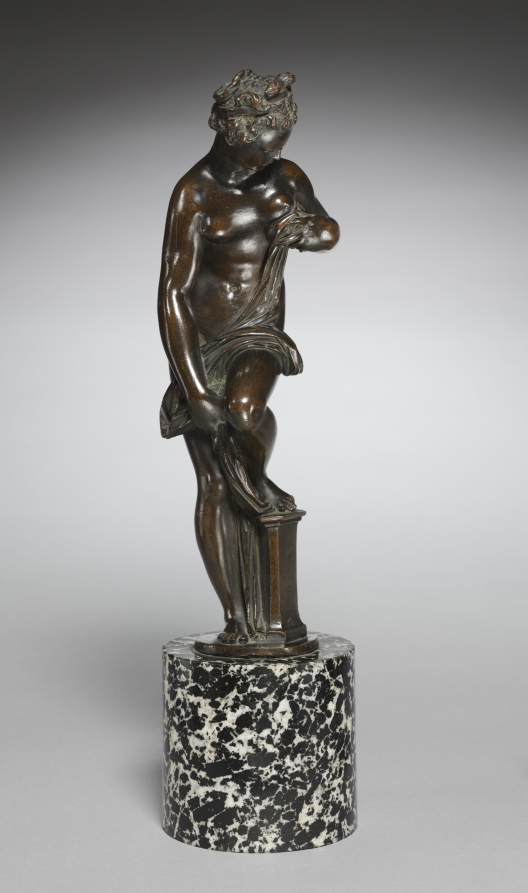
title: Venus after the Bath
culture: Italy, early 17th century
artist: cast possibly by the Workshop of Giambologna (Flemish, active Italy, 1529–1608)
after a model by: Giambologna (Flemish, active Italy, 1529–1608)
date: c. 1600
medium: bronze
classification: Sculpture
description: The statuette’s scale speaks to its likely place in private, intimate settings. The serpentine composition would have encouraged close examination from multiple angles. Compare the complexity of her pose to the relatively static Venus with a Burning Urn (1948.171).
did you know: Giambologna intended his bronze statuettes to be held and touched, to fully appreciate their smooth, elegant forms.